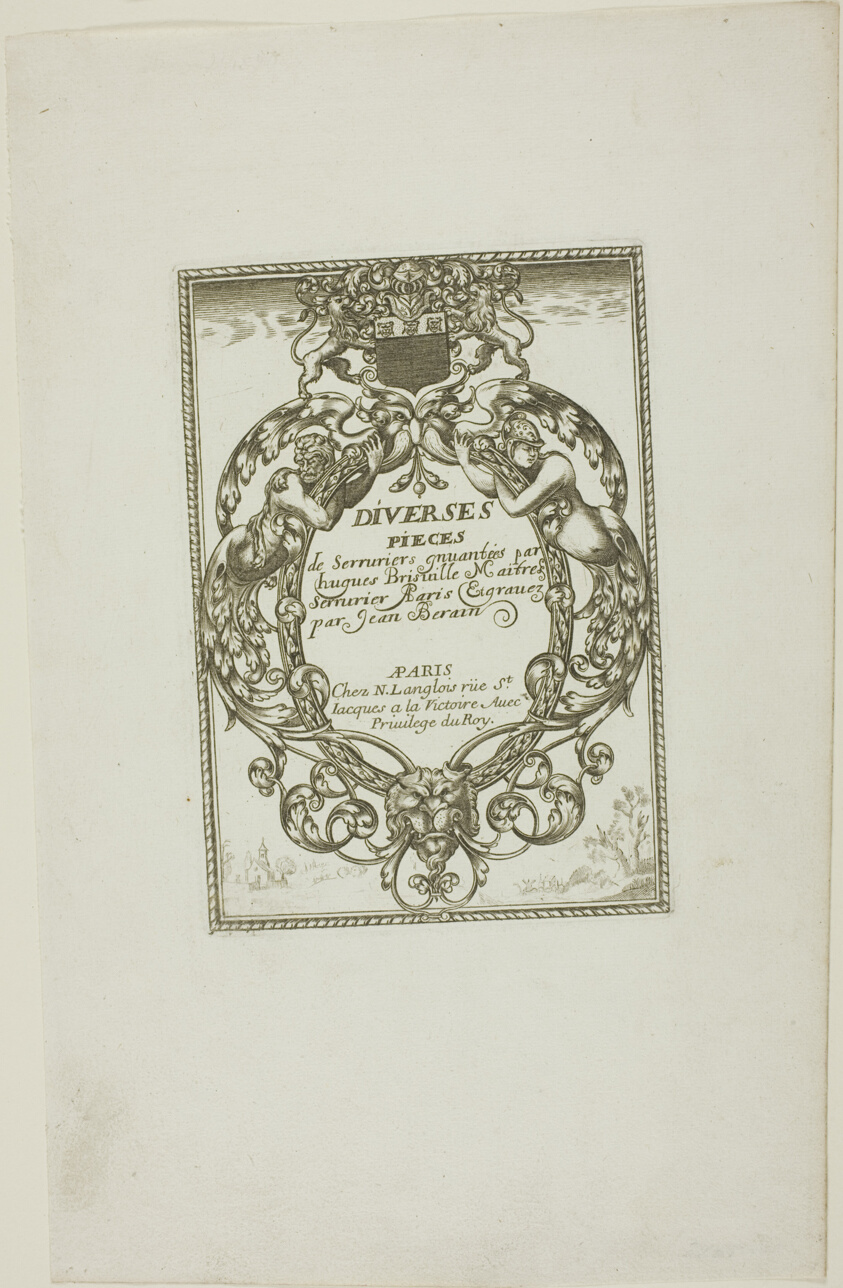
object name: Print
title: Designs for Locksmiths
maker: Jean Bérain I (French, 1640-1711); after Hugues Bris e Ville (French)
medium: Etching on paper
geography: France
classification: etching; print; prints and drawing